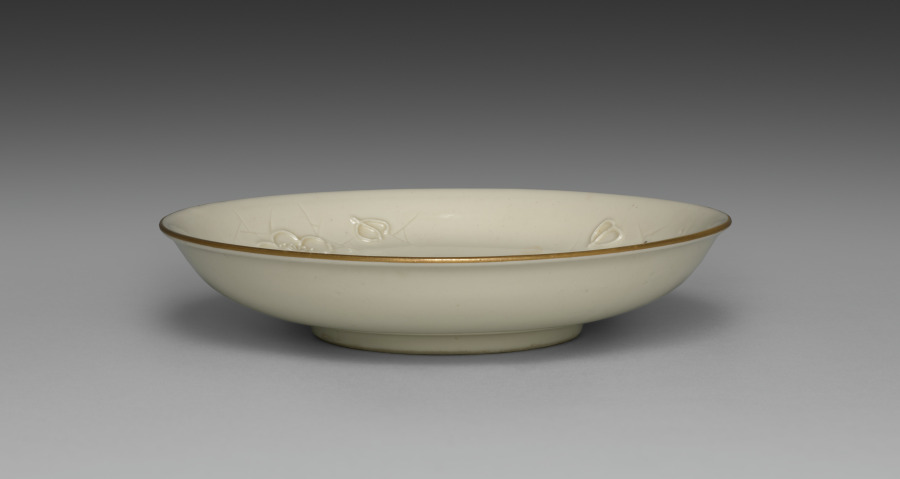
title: Medium-sized Dish from Dining Set with Plum Blossoms and Cracked-Ice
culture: Japan, Meiji period (1868–1912)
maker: Seifū Yohei II (Japanese, 1844–1878)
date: c. 1875–78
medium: Porcelain with molded designs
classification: Ceramic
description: Each item in this set has a delicate low-relief design of flowering plum branches over scattered, intersecting lines meant to resemble the cracked-ice surface of a frozen body of water and is signed on the base in gold pigment. While Yohei II produced many fine works in underglaze blue, like those produced by Kiyomizu Shichibei, he also made works in quite different styles later in his career, from the early 1870 s. In 1873, he was appointed purveyor to the Industrial Center of Kyoto Prefecture, a designation associated with Kyoto’s efforts to reach an international market through the port of Kobe; and from 1875 until his death, he was involved in national-level projects to present Japanese ceramics across the world. It was during this period that Yohei III was apprenticed to Yohei II, and it has been suggested that this set may in fact be an early example of Yohei III’s work, which he signed with his teacher’s name. Decorated with flowers resembling Japanese textile motifs, the set calls to mind the design of Yohei II’s pair of vases with plum blossoms in the Victoria and Albert Museum. Here, the elaborate trees created for a formal public exhibition setting have been translated into the approachable blossoms of the genteel domestic environment. While the designs are consistent across the pieces, each raised flower petal and pistil and each incised line in the ice was done by hand, so the cups, bowls, and dishes are similar yet unique. The bottoms of two boxes once identified the set’s owner, but the information has been deliberately obscured with black ink. However, inscriptions still visible appear to indicate two occasions, once at the end of July 1886 , and once again in June 1916 , when parts of the set were requested from Hokura in Niigata Prefecture. The location corresponds to a neighborhood in the present-day city of Jōetsu. The surname Tsuji 辻 also appears on a paper tag affixed to one of the box cloths. Future research may possibly reveal more about their provenance. A vase by Yohei III in a private collection combines the formal grandeur of the Yohei II vases in the Victoria and Albert Museum with the gentler design of this dining set, placing flowering plum trees against soft, scalloped-edge clouds resembling those in golden screens.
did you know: The dining wares have a creamy white coloration that the four boxes containing them identify as Korean in style.